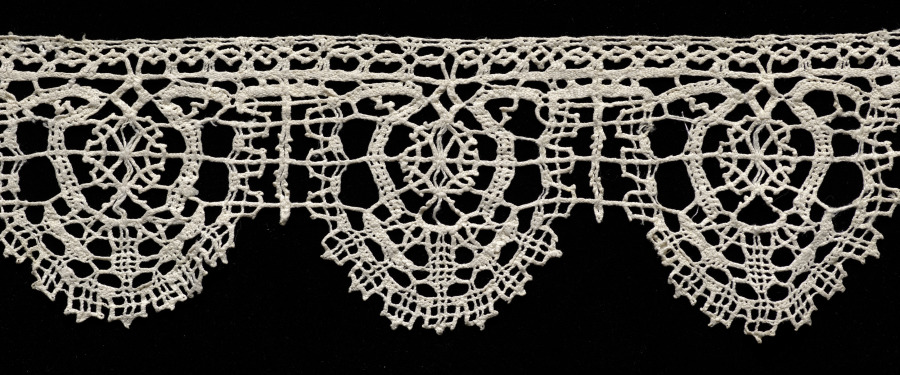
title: Lace Edging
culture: Italy, Genoa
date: 1600s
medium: Bobbin lace (Rose Lace)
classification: Lace